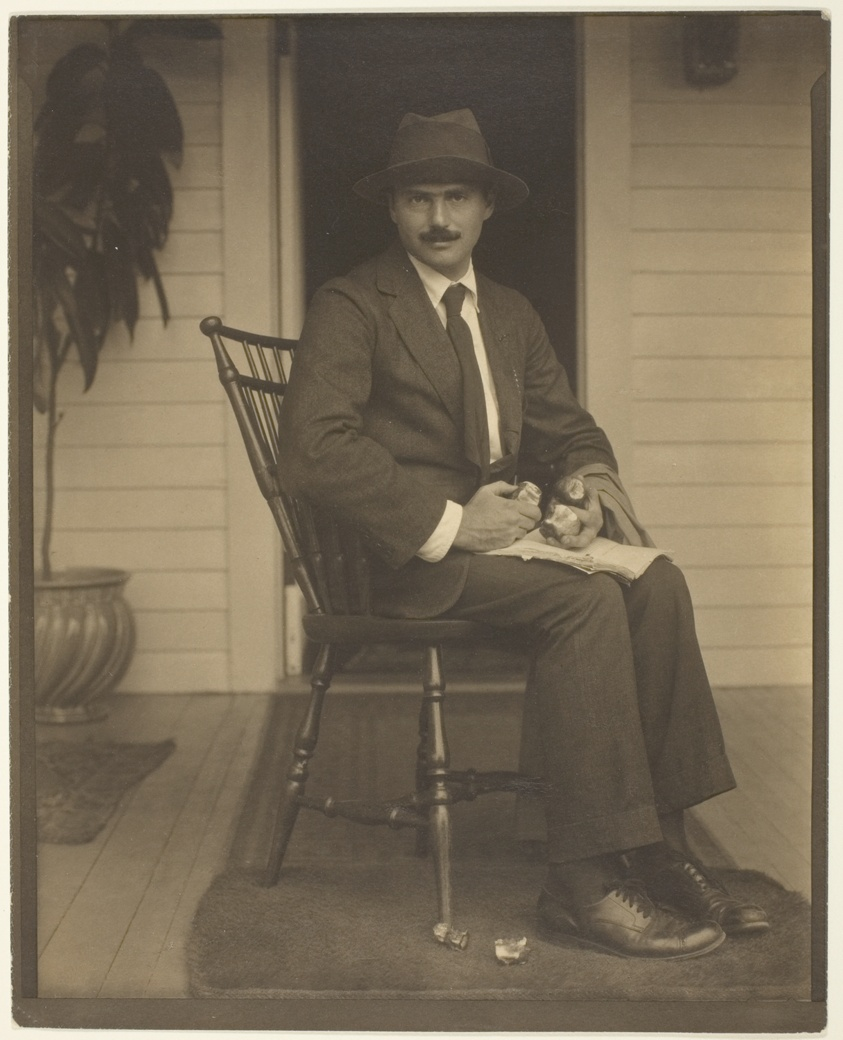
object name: Photograph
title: Waldo Frank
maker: Alfred Stieglitz (American, 1864–1946)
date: 1920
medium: Palladium print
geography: United States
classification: palladium print; photographic process; photography; photograph